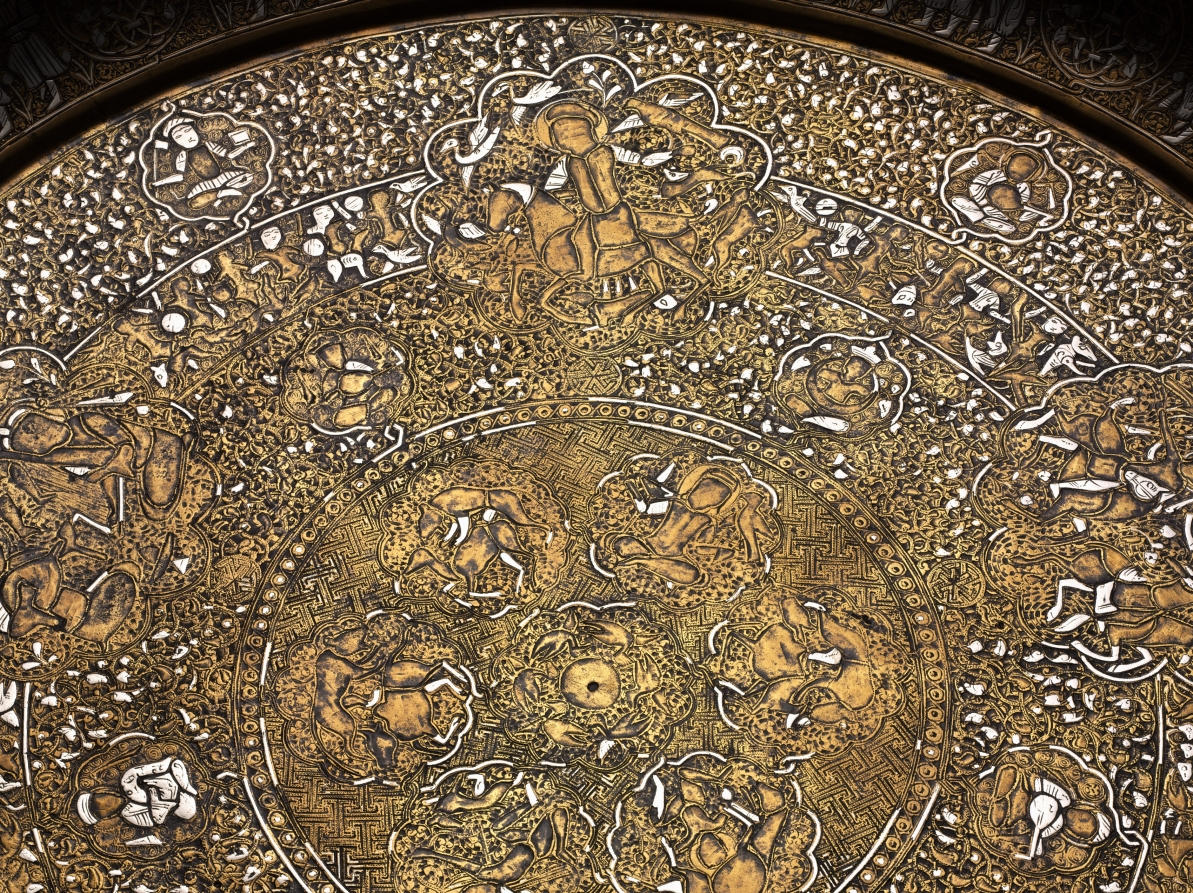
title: Tray Portraying Courtly Pleasures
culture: Syria, Ayyubid period (1171–1260)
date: 1240s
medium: sheet brass inlaid with silver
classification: Metalwork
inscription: The presence of ligatures in the narrow circular bands with interconnected human and animal figures suggests this may be a degenerate form of animated script. It is indecipherable.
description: This tray features images of courtly life interspersed with astronomical symbols. The scenes contained within large multilobed medallions display an enthroned prince with lions at his feet, a banquet, a hunt, dancers, and musicians. Contained within the concentric circles there are also references to solar and lunar motifs, including figures holding sunbursts and lunar crescents. This tray is made of a single sheet of brass and the silver inlay, which is best preserved on the tray’s inner curve, suggests its original brilliance.